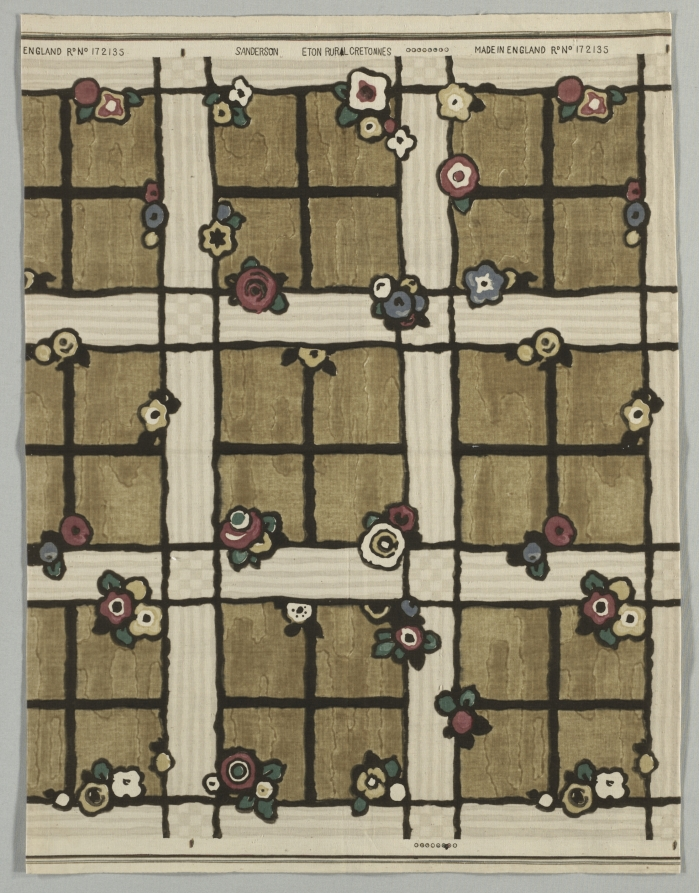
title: Eton Rural Cretonne (No. 172135)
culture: England, late 19th century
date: late 19th century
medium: plain weave cotton, printed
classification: Textile